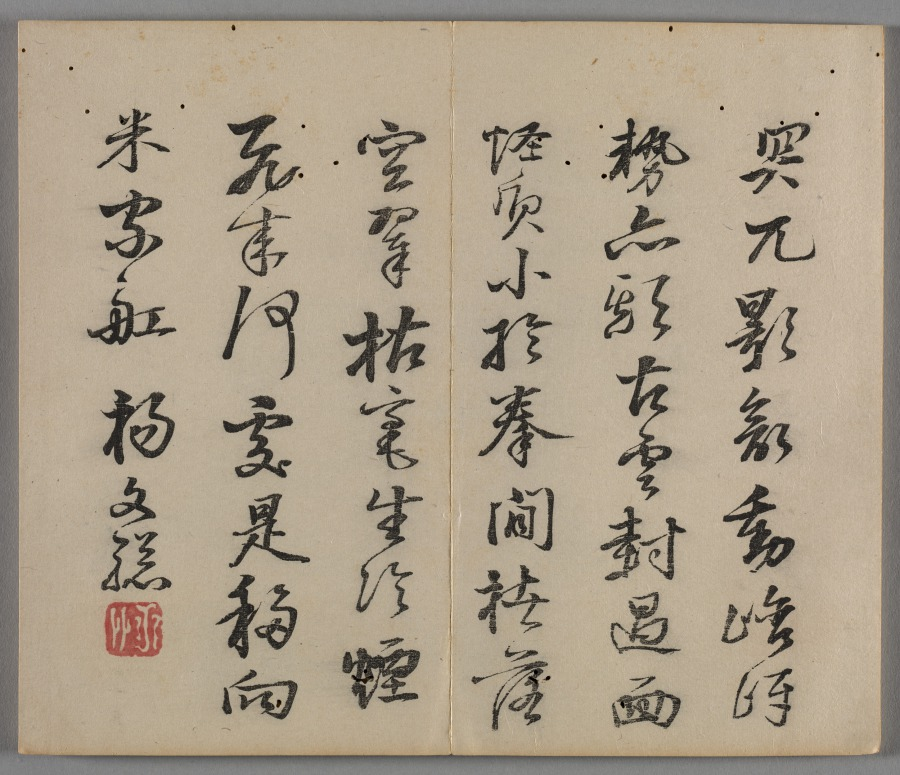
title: Ten Bamboo Studio Painting and Calligraphy Handbook (Shizhuzhai shuhua pu): Rocks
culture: China, Qing dynasty (1644-1911)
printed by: Hu Zhengyan (Chinese, c. 1584–1674)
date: 1633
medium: Woodblock-printed book; ink and colors on paper; first edition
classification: Print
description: Color printing reached a level of perfection in the early 1600s, as seen in this Ten Bamboo Studio Collection of Calligraphy and Painting and the Mustard Seed Garden Manual of Painting (printed 1679 and 1701). The painterly quality, precision in registering (aligning) the woodblocks, and harmonious colors made them the most successful color print editions in Chinese history. Both editions were printed and compiled in Nanjing, spread nationwide, and had a great impact on the arts in Japan and Korea.